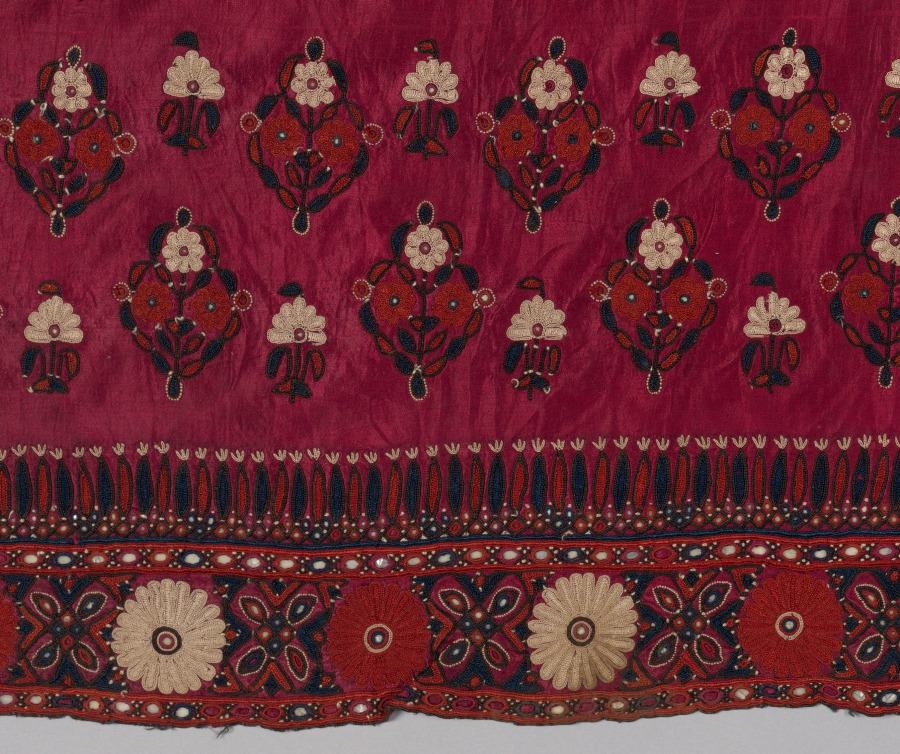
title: Skirt (?)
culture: Western India, Gujarat, Kachchh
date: 1800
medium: silk thread on silk ground, embroidery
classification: Embroidery